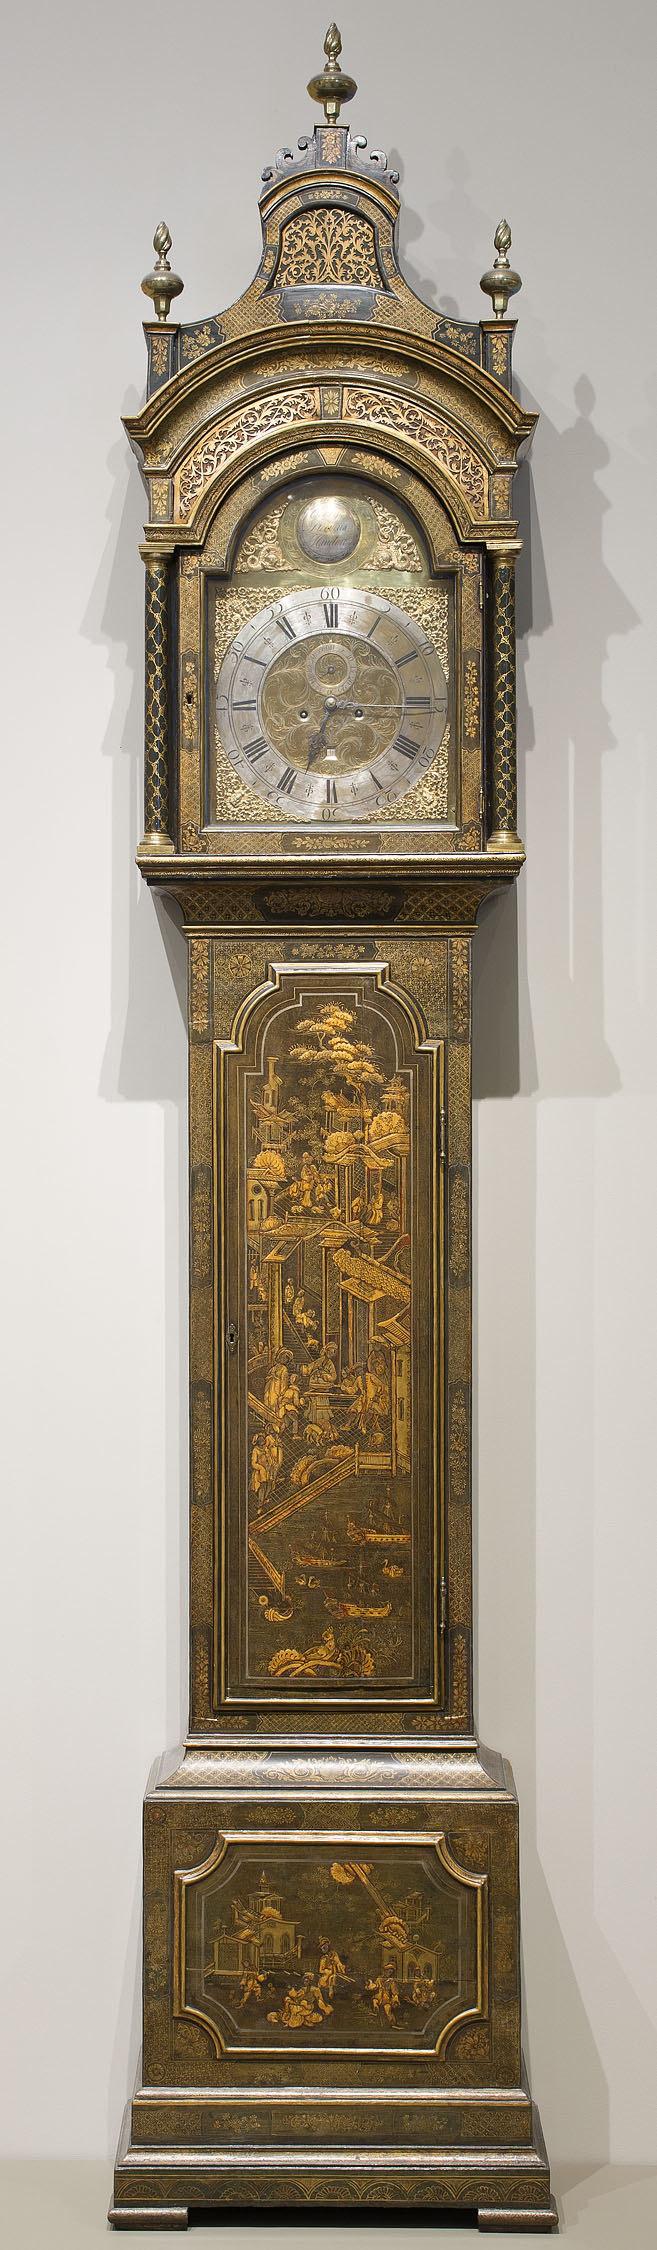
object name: Furniture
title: Tall-Case Clock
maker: Movement by George Stevens; Hindon, England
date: c. 1770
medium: Japanned pine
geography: Hindon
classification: clock; furniture; european decorative arts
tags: furniture